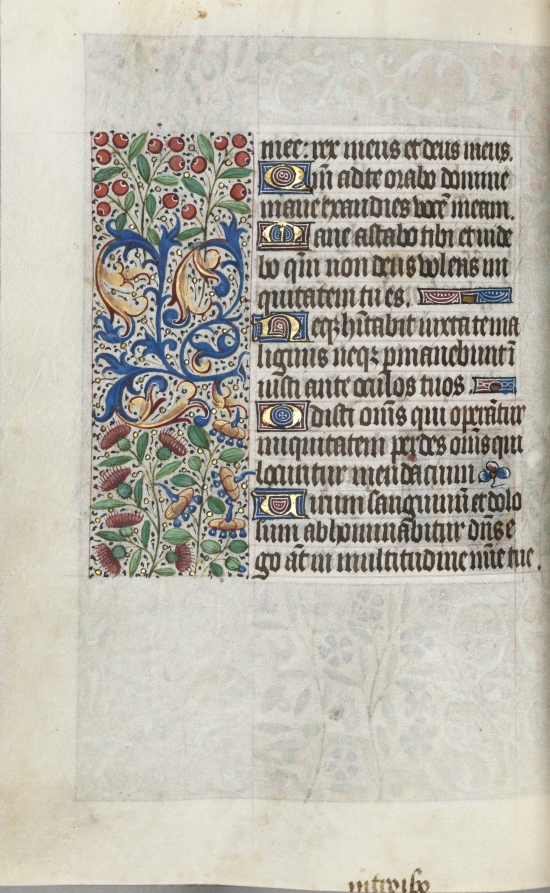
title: Book of Hours (Use of Rouen): fol. 110v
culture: France, Rouen, 15th century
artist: Master of the Geneva Latini (French, active Rouen, 1460–80)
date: c. 1470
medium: ink, tempera, and gold on vellum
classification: Bound Volume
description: In the late 1400s and early 1500s Rouen was an established and important center of book production. The city’s cathedral had a wealthy chapter that spent large sums of money to commission books and to maintain its extensive library. The stationers and booksellers would have likely been concentrated in or near the cathedral precinct. This artist, named after a manuscript now in Geneva, was Rouen’s principal illuminator during the second half of the 1400s.